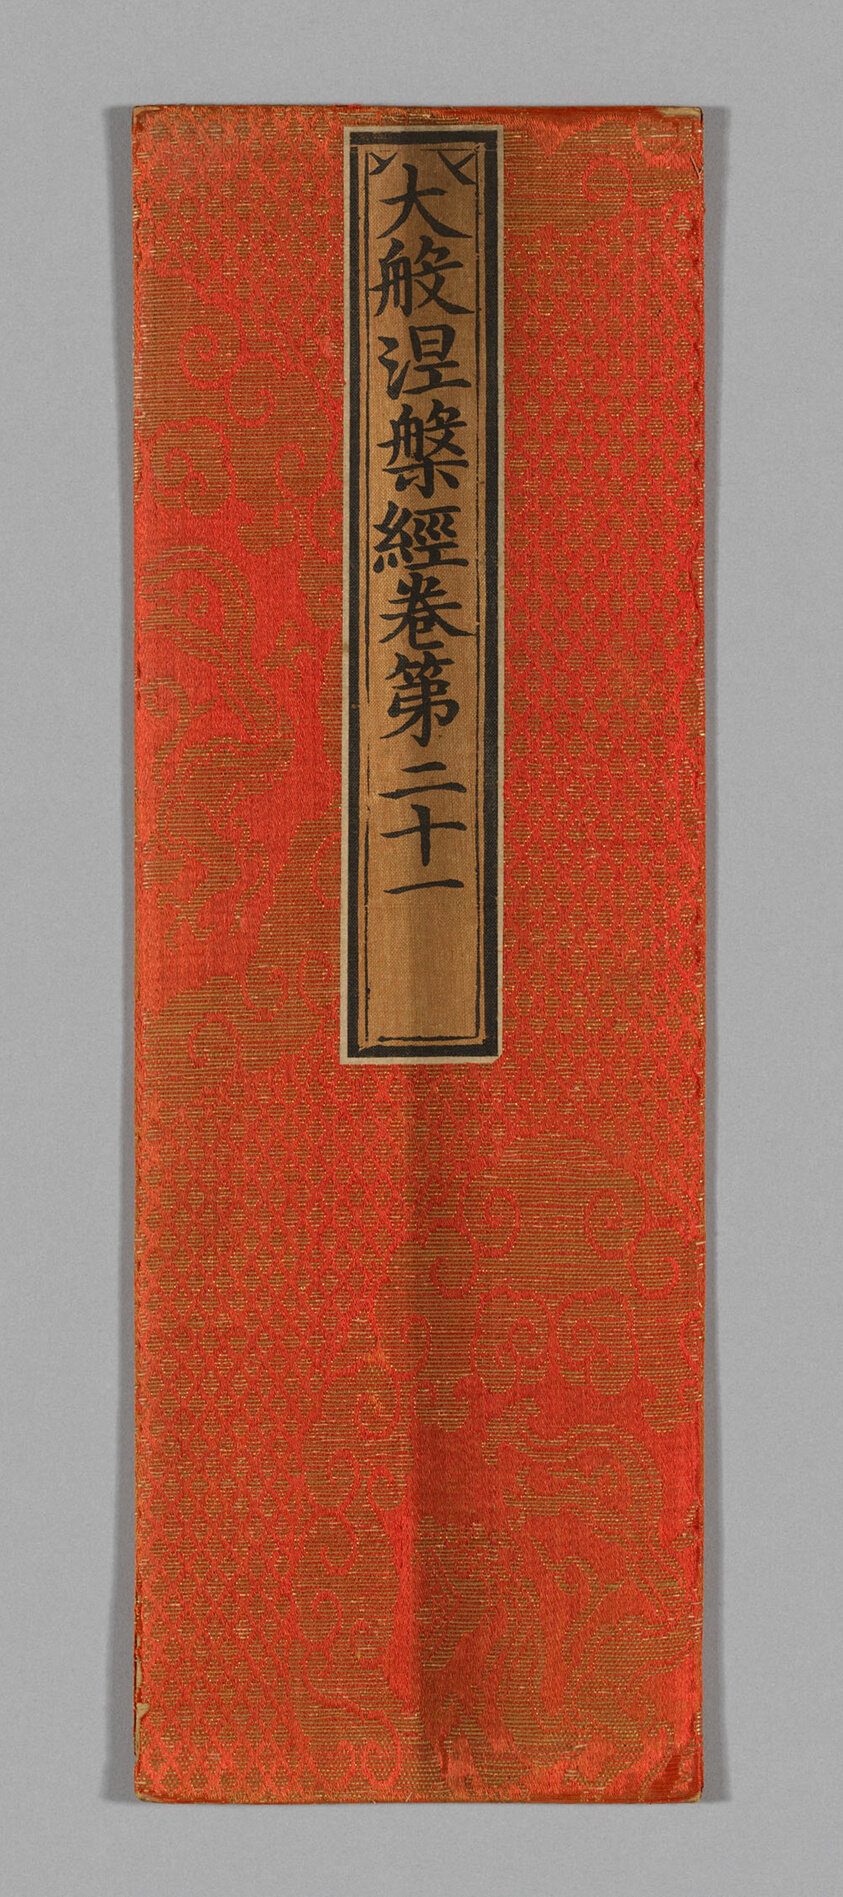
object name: Textile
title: Sutra Cover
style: ming, Chinese (culture or style), East Asian, asian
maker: China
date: Ming dynasty (1368–1644), c. 1590's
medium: Silk and gold-leaf-over-lacquered-paper strips, warp-float faced 4:1 satin weave with supplementary patterning wefts bound in 1:4 weft-float faced satin interlacing; label: silk, plain weave; painted with ink, glued over paper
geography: China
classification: textile; weaving